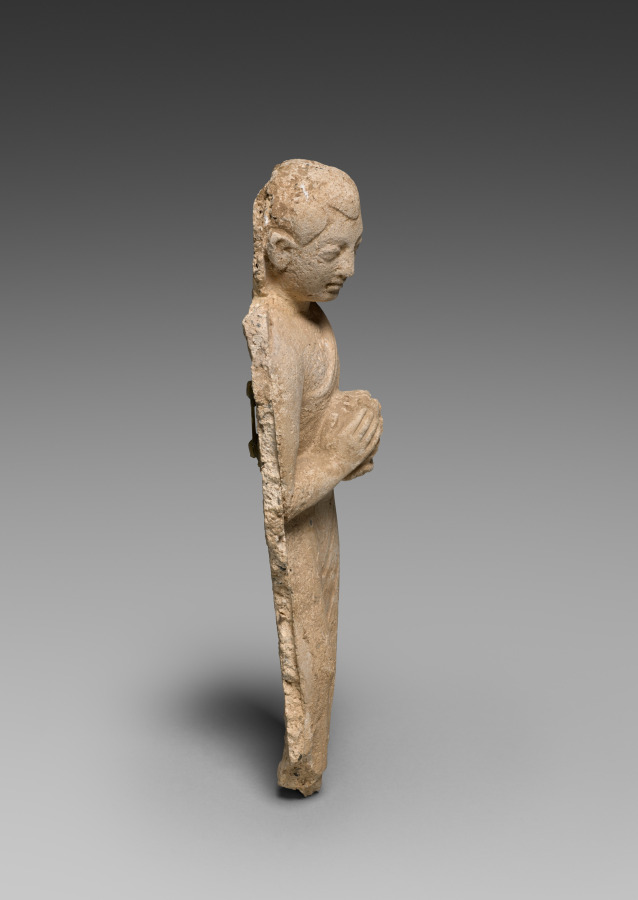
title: Monk bearing offerings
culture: Afghanistan, Hadda, probably Tape Shotor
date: c. 300 CE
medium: stucco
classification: Sculpture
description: This Buddhist monk wears a robe over one shoulder, and his hair has been shaved. He reverently brings offerings of fruit or flowers to the Buddha. Triads depicting the Buddha with attendants bringing offerings were set up on the base of monuments called stupas, in niches defined by pilasters with Corinthian-style columns indicative of the region's Hellenistic heritage.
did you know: This sculpture came from a monastery famous for preserving pieces of the Buddha's skull and robe.